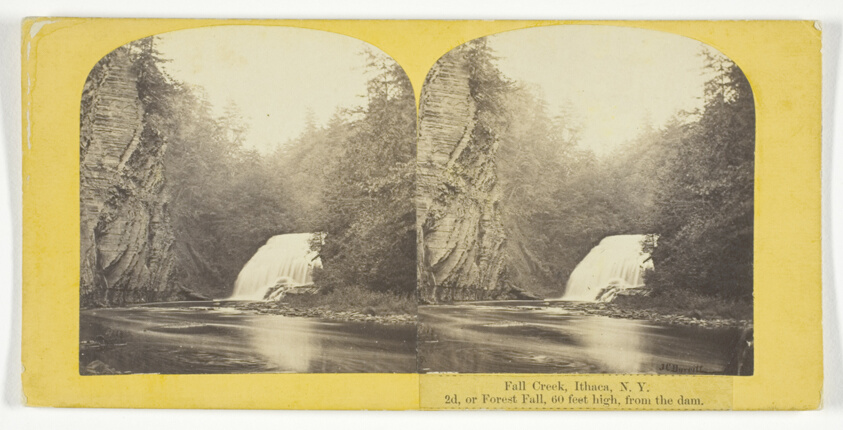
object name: Photograph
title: Fall Creek, Ithaca, N.Y. 2d, or Forest Fall, 60 feet high, from the dam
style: 19th century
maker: J. C. Burritt; American, active 1860s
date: 1860/65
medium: Albumen print, stereo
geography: Ithaca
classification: photography; photograph; albumen silver print; stereograph (albumen)